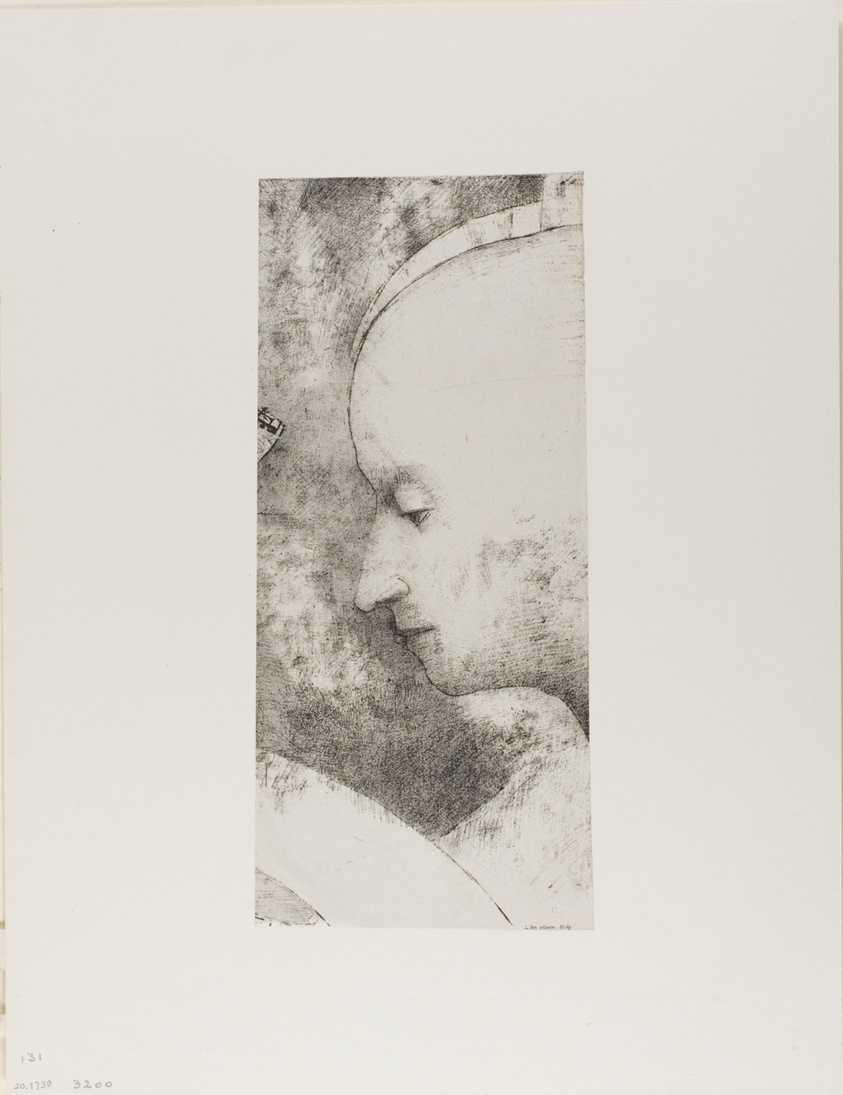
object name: Print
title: The Celestial Art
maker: Odilon Redon (French, 1840-1916)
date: 1894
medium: Lithograph in black on off-white China paper laid down on ivory wove paper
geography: France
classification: lithograph; print; prints and drawing; paper